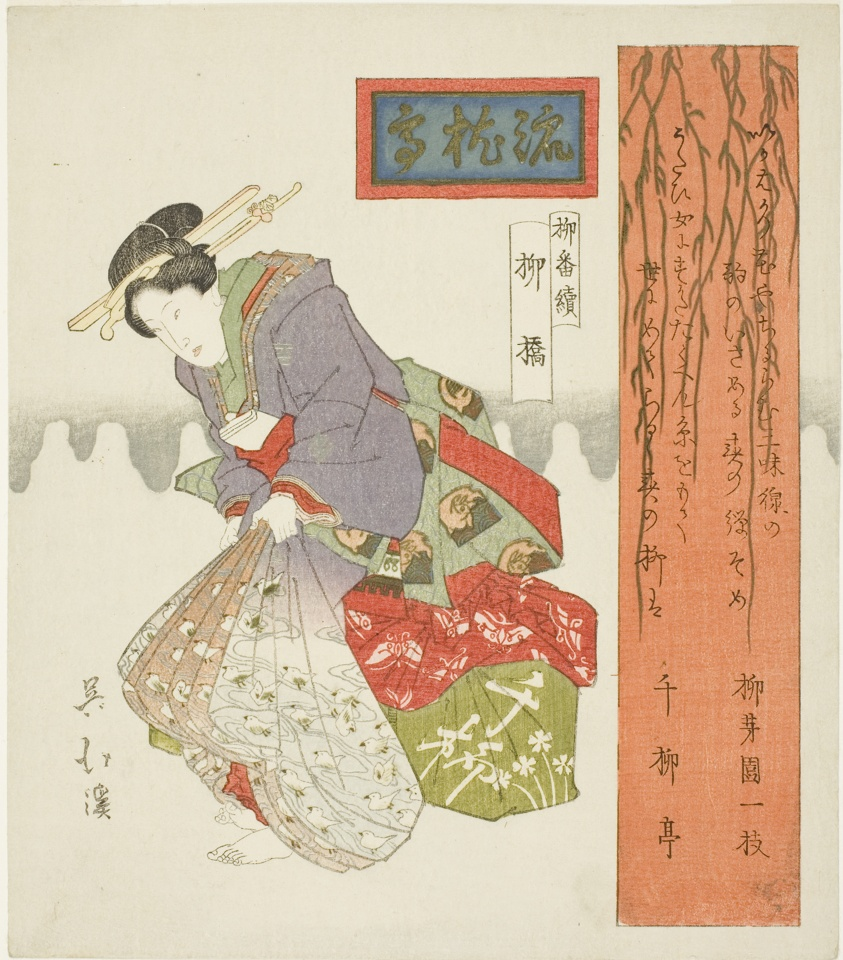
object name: Print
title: Willow Bridge (Yanagibashi), from the series "A Series of Willows (Yanagi bantsuzuki)"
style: Japanese (culture or style)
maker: Totoya Hokkei (Japanese, 1780-1850)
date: c. 1828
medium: Color woodblock print; shikishiban, surimono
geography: Japan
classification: woodblock print; print; asian art